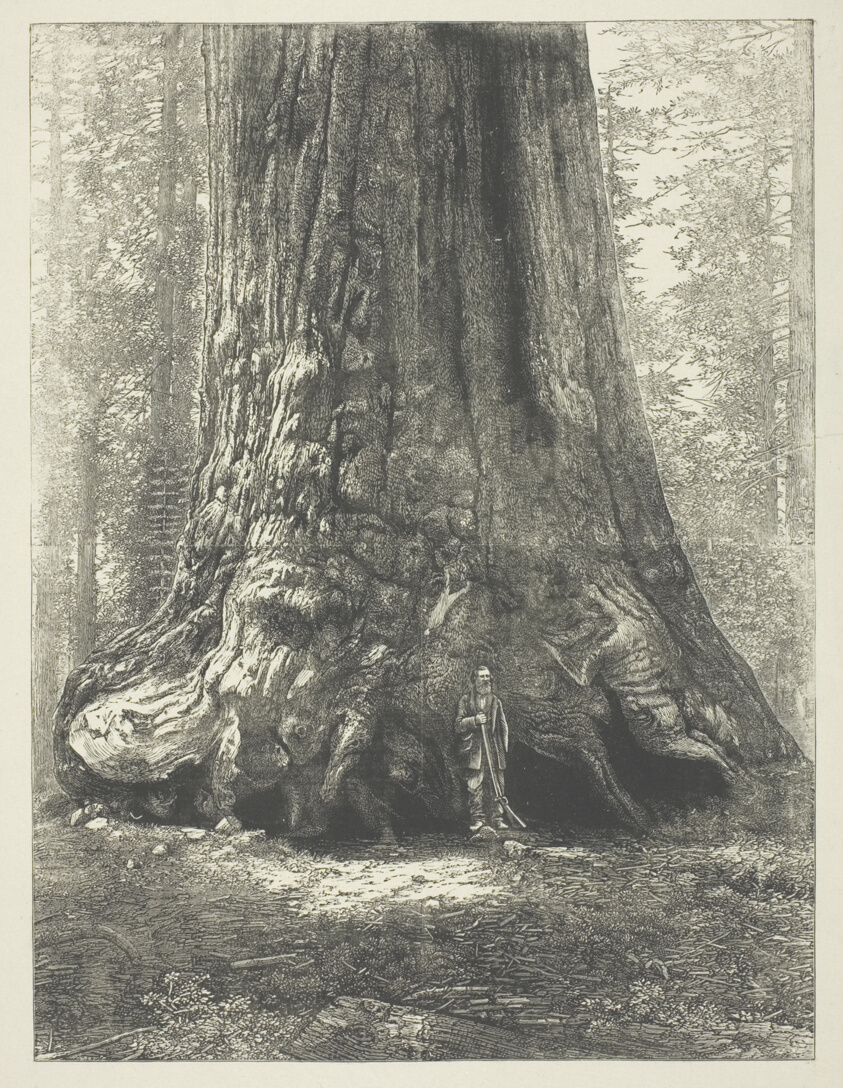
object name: Photograph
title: Copy of Carleton Watkins' "Galen Clark Before the Grizzly Giant,"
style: 19th century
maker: Artist unknown; after Carleton Watkins (American, 1829–1916)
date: c. 1863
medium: Print on paper from woodcut engraving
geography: United States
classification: woodcut; printing process; photography; photograph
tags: Collected by Hugh Edwards